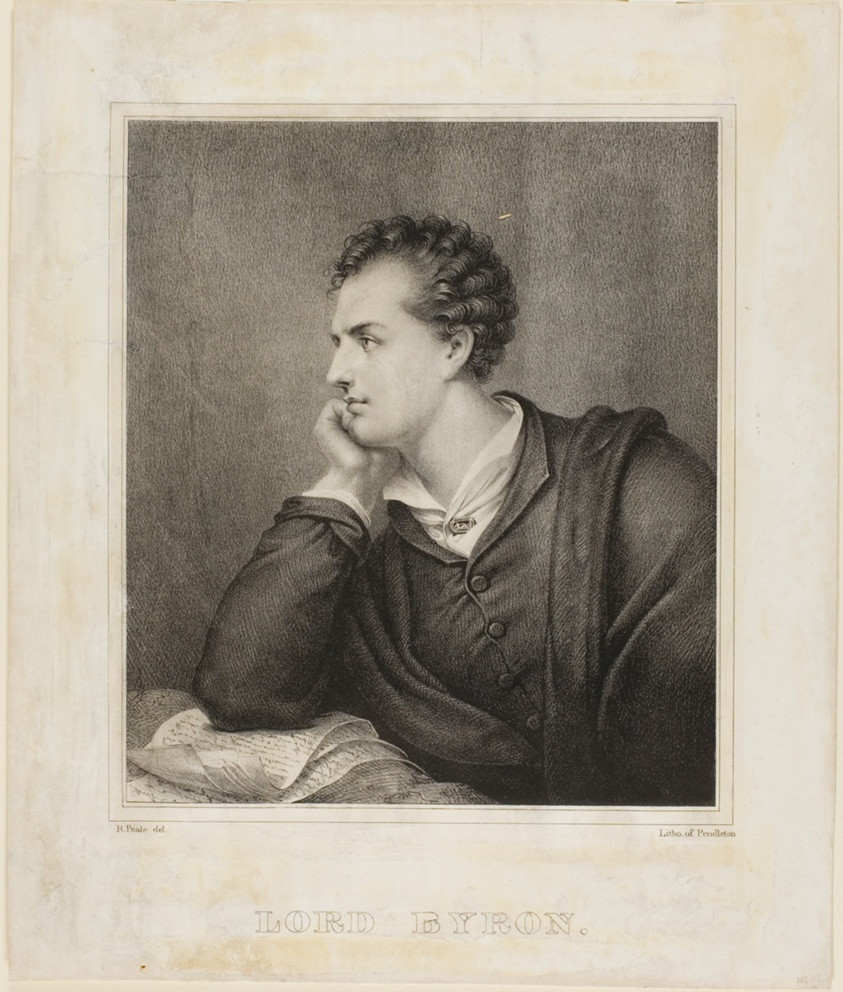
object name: Print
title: Lord Byron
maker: Rembrandt Peale (American, 1778–1860)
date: 1825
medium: Lithograph on cream wove paper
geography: United States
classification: lithograph; print; prints and drawing